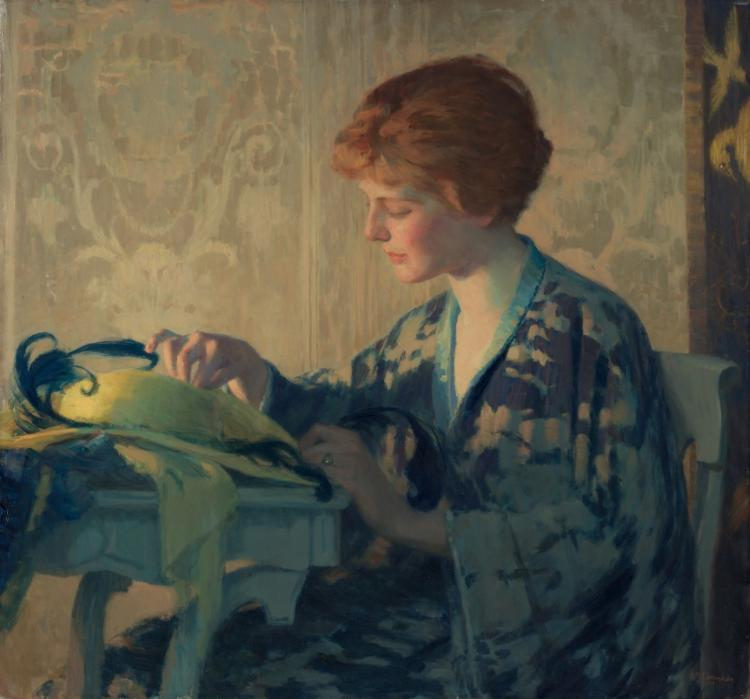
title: The Blue Feather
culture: America, Ohio, Cleveland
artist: William J. Edmondson (American, 1868–1966)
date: 1917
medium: oil on canvas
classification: Painting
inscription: signed lower right: Wm. J. Edmondson/ 1917.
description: Throughout his long career, Edmondson stubbornly resisted modernist styles and proudly proclaimed himself a traditionalist. He felt that artists should paint what they see, and once declared, "When painting a portrait, I do not indulge in this ‘painting of the soul’ stuff. When some artists fail to get a likeness of a person they say they have not tried to paint him, but have painted his soul." The sitter in The Blue Feather was Edmondson's student, Caroline Mytinger, who often modeled for him. Later a portraitist in her own right, she traveled to New Guinea and the Solomon Islands to record its indigenous people.